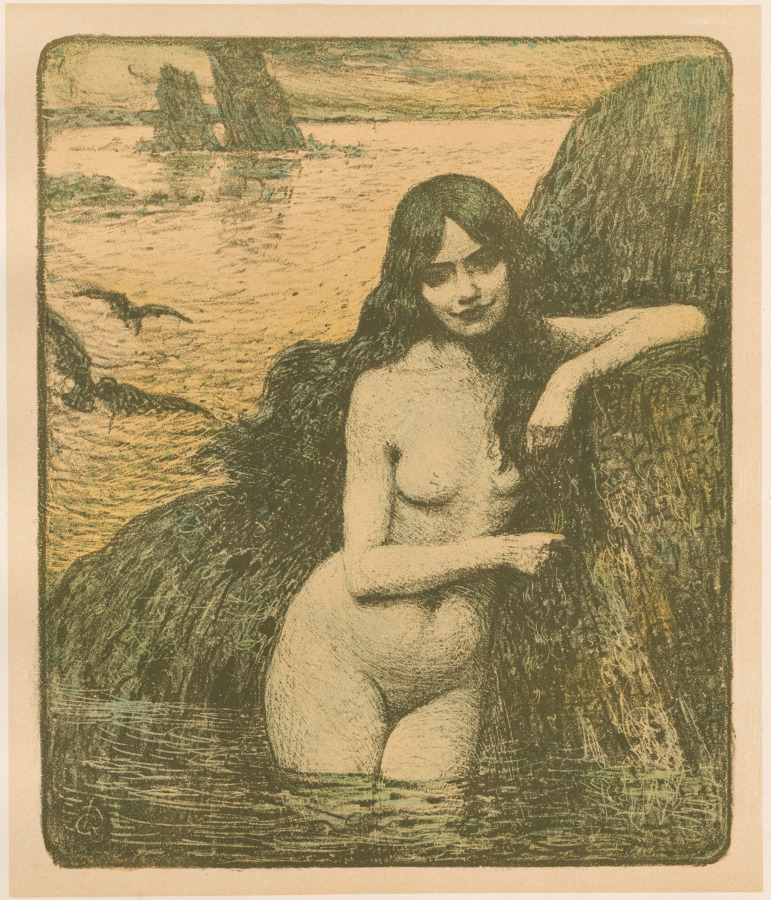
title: Sirène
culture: France, Paris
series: L'Estampe Moderne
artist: Charles-François-Prosper Guérin (French, 1875–1939)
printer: Imprimerie Champenois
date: 1896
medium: Color lithograph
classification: Bound Volume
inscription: In plate: lower left corner of image: superimposed "C" and "G"; lower right corner: blindstamp of l'Estampe Moderne (Lugt 2790)